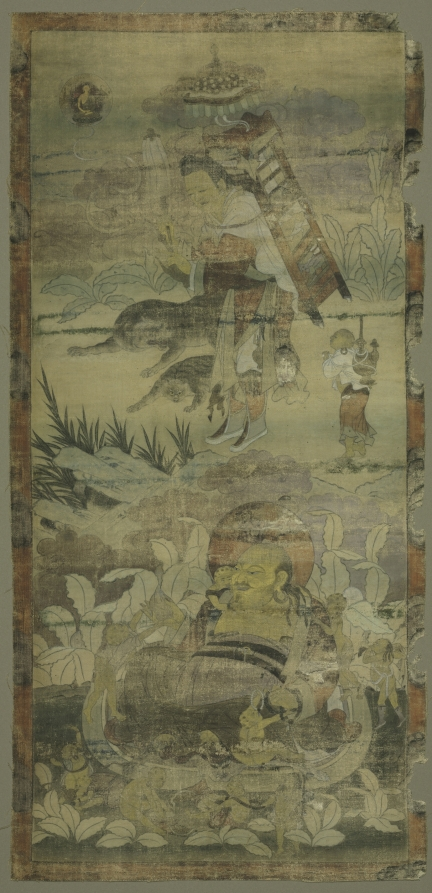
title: Lohans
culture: Sino-Tibetan, Yuan dynasty (1271-1368)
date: c. 1300–1350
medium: color and gold on cotton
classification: Painting